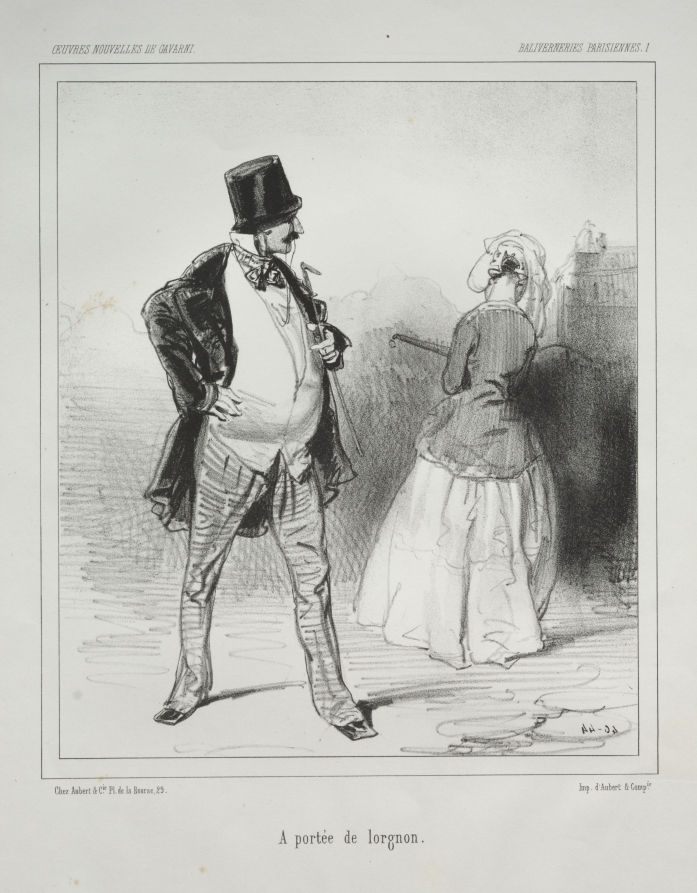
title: A portée de lorgnon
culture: France, 19th century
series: Baliverneries Parisiennes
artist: Paul Gavarni (French, 1804–1866)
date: c. 1847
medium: lithograph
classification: Print